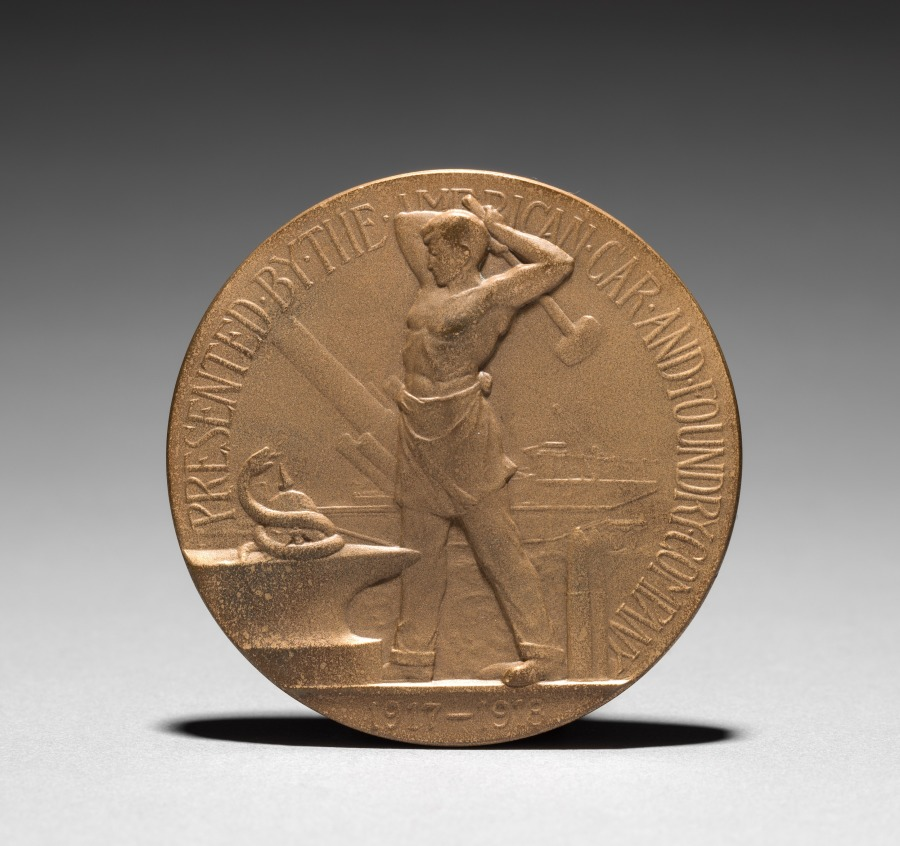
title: Honor Medal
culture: America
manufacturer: American Car and Foundry Co. (American)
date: 1917–1918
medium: bronze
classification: Metalwork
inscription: "For Service Faithfully Rendered"; signed: "C.B. - J.K."